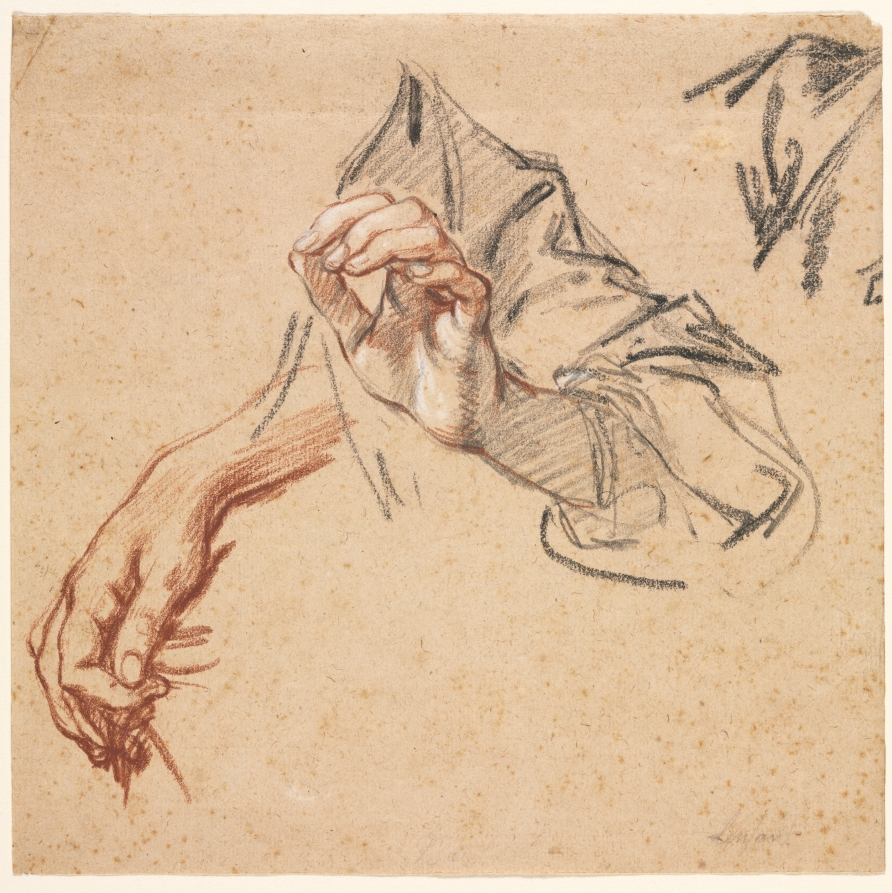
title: Study of Hands (recto)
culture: France, 18th century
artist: Pierre Lenfant (French, 1704–1787)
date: 1700s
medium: red and black chalk heightened with white chalk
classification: Drawing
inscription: lower right, in graphite: lenfant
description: After Pierre Lenfant served as the official battlefield artist to King Louis XV in the War of the Austrian Succession (1740–48), he and his family were awarded a lifetime residence at the royal Gobelins Manufactory on the outskirts of Paris. This delicate study in colored chalks may depict a weaver pulling threads in the textile factory.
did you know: This drawing is executed in a technique called trois crayons, referring to the three colors of chalk used by the artist. It was especially popular among artists in 18th-century France.